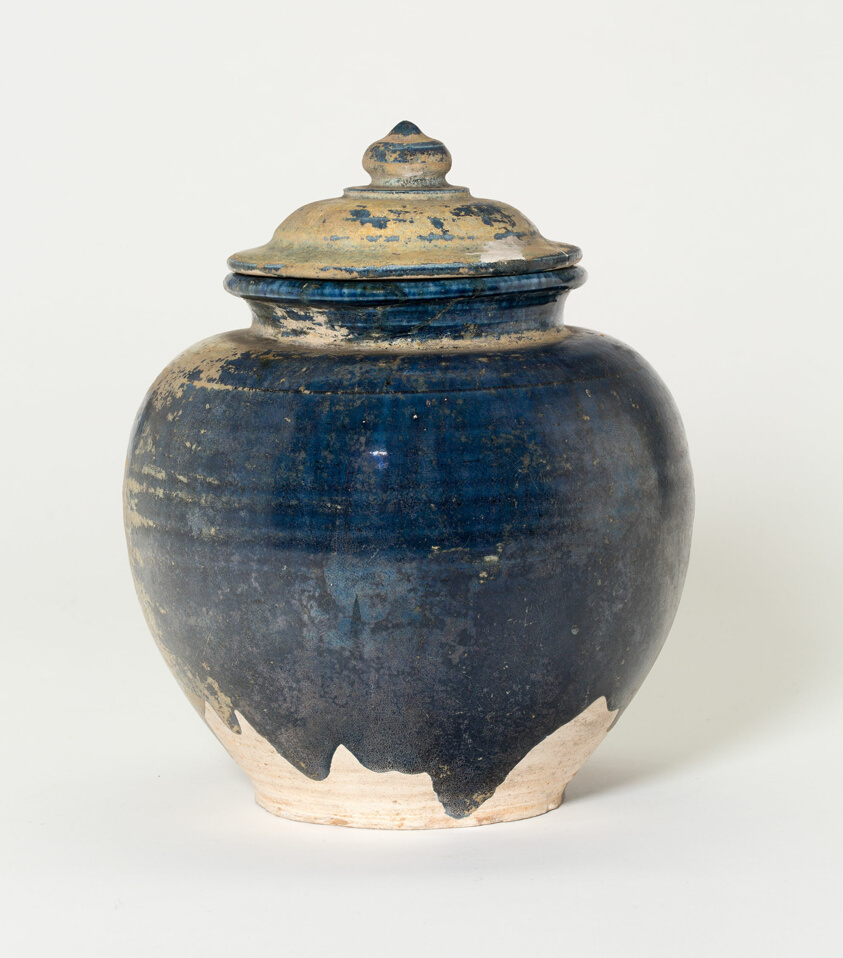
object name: Vessel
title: Covered Jar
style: Chinese (culture or style)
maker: China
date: Tang dynasty (618–906)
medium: Stoneware with blue lead glaze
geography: China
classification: ceramics; asian art; vessel